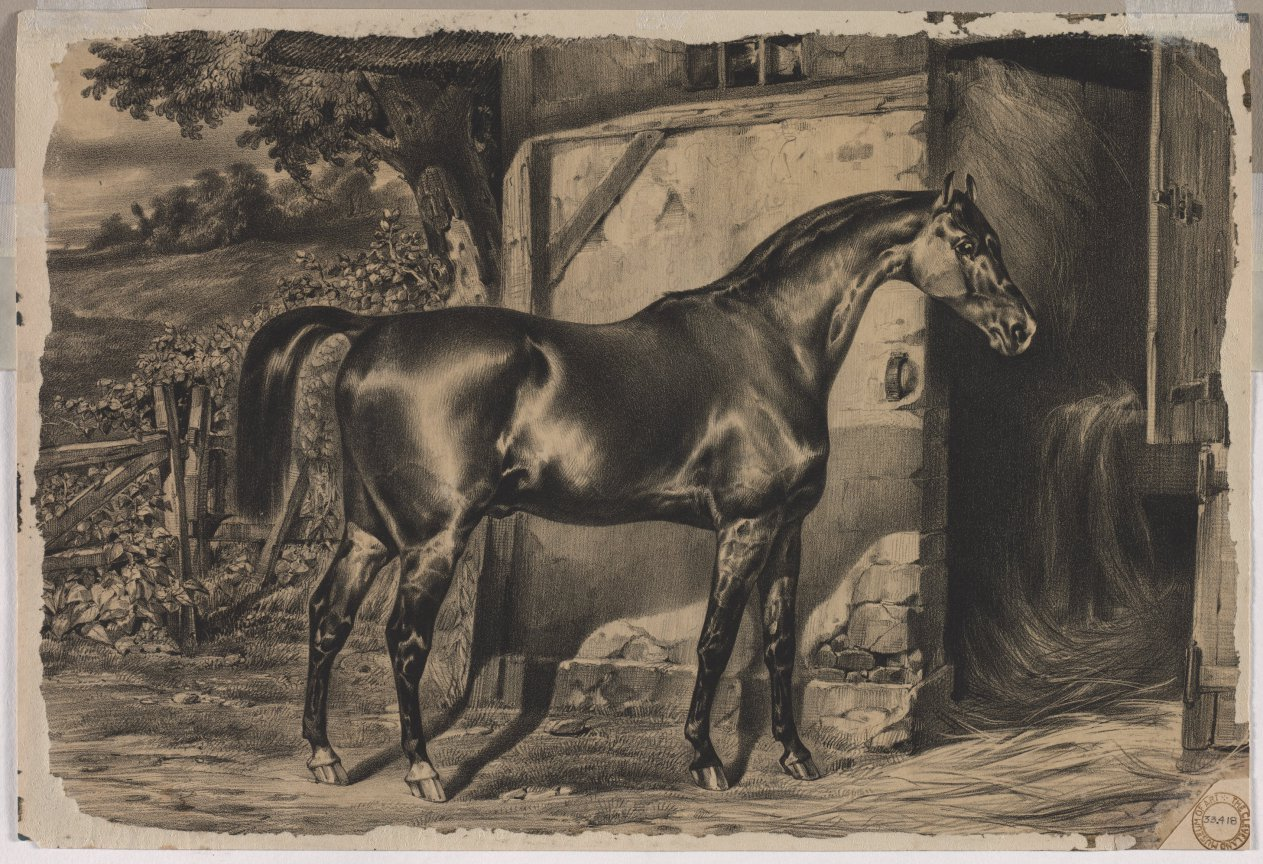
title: Horse in Front of a Barn (verso)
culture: France, 19th century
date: c. 1820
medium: lithograph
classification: Print